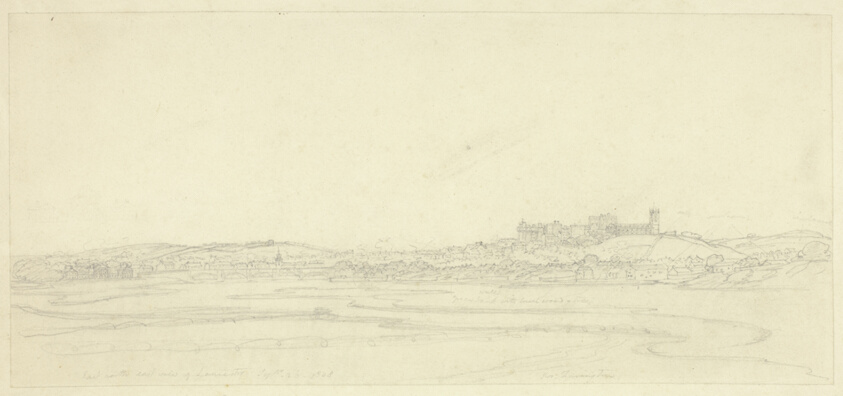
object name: Drawing and Watercolor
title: East North East View of Lancaster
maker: Joseph Farington (English, 1747-1821)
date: 1808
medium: Graphite on ivory wove paper, laid down on ivory wove paper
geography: England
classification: graphite; drawings (visual works); prints and drawing